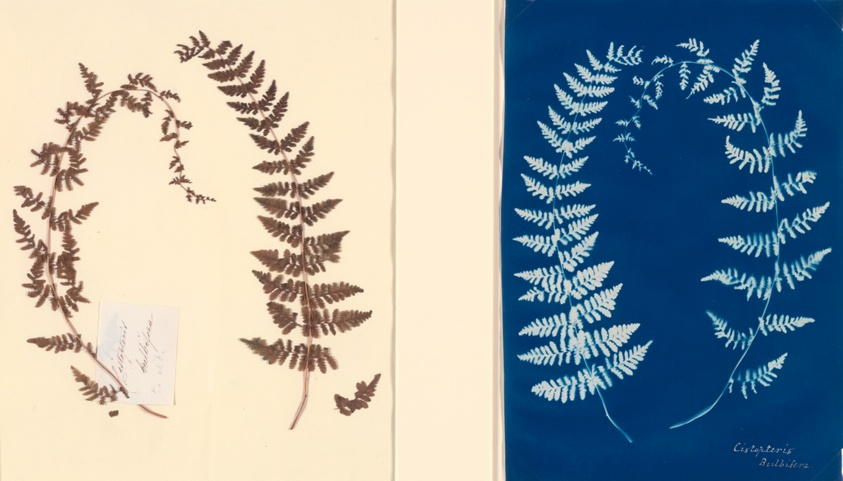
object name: Photograph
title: Untitled (Fern Study), c. 1850, from the Hatton Fern Album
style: 19th century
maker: Anonymous; English, 19th Century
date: c. 1850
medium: Cyanotype and fern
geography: England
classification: cyanotype; photographic process; photography; photograph